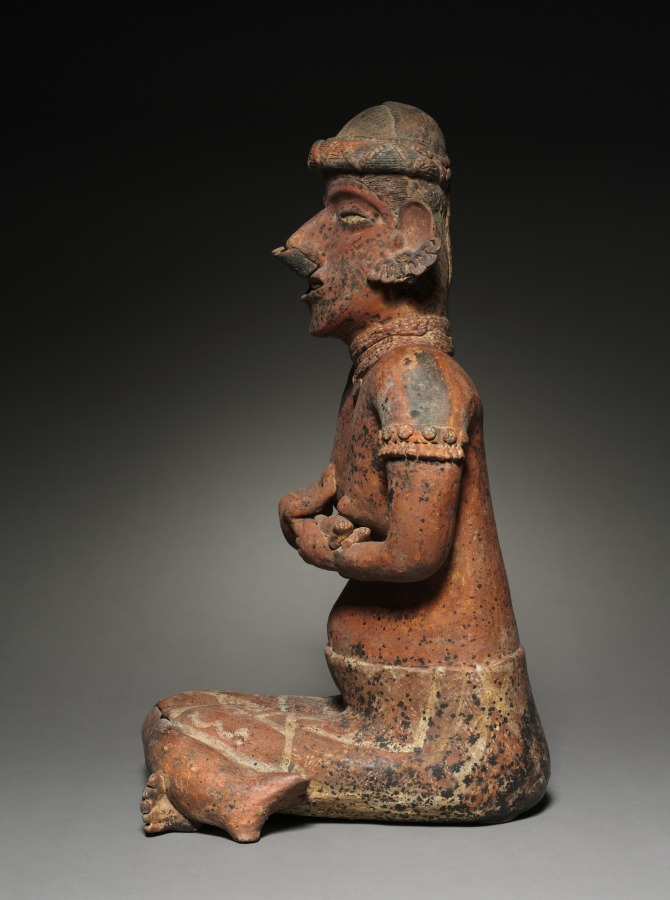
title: Female Seated Figure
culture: Mexico, Nayarit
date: 100 BCE–300 CE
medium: ceramic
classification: Ceramic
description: This couple-extremely fine examples of their kind-may commemorate the marriage of an important person, such as a chief, but could also represent siblings of a chiefly family. Whatever their relationship, their unity is conveyed by their physical similarities, including their jewelry, which marks high social station. The female is unusual in nursing an infant, likely a reference to generational renewal and the continuation of noble bloodlines. The significance of the male’s activity-beating a turtle-shell drum- is not understood.